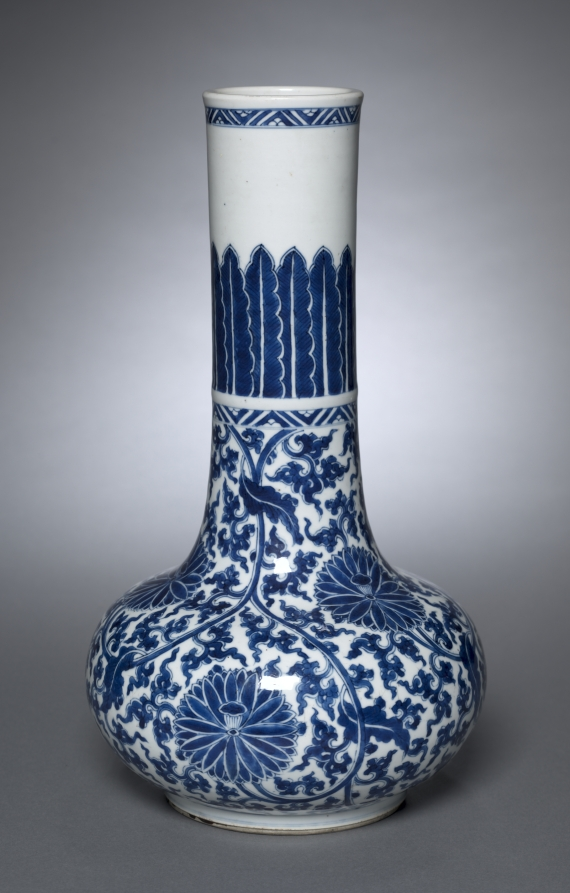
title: Bottle Vase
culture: China, Jiangxi province, Jingdezhen kilns, Qing dynasty (1644-1911), Kangxi reign (1662-1722)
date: 1662–1722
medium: porcelain with underglaze blue decoration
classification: Ceramic